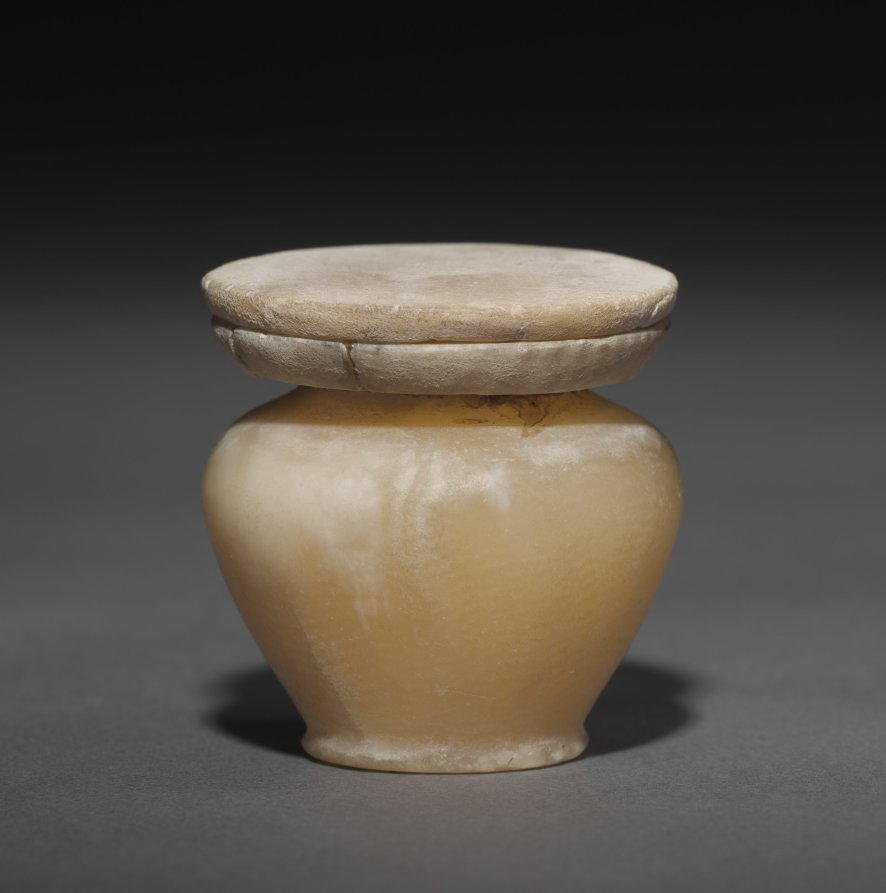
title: Kohl Jar with Lid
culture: Egypt, Middle Kingdom (2040–1648 BCE), Dynasty 12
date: 1980–1801 BCE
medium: travertine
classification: Vessels